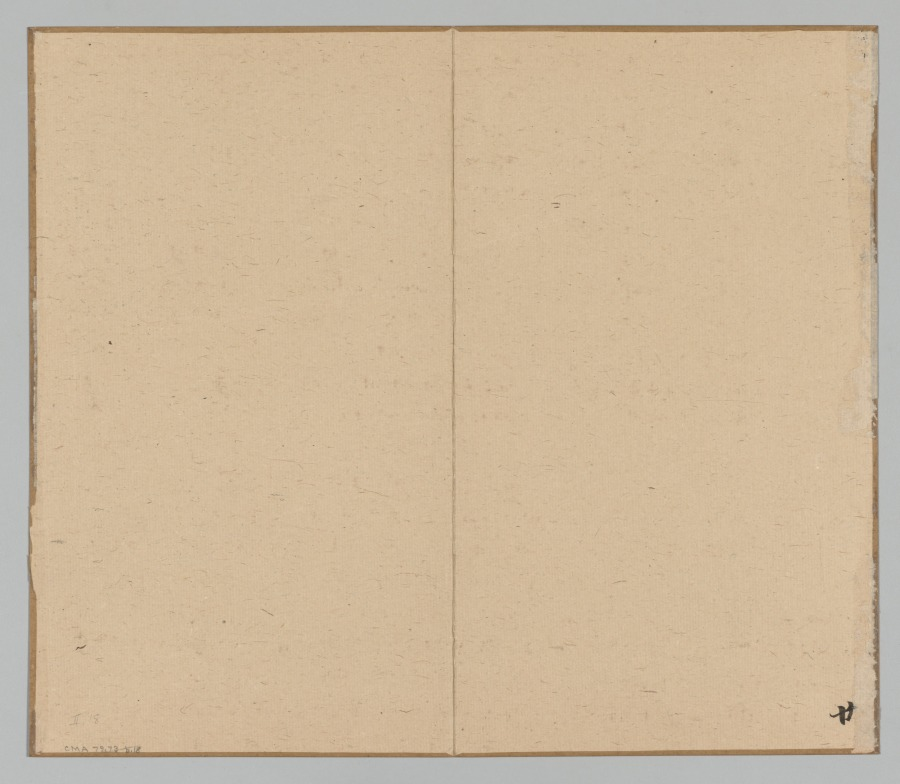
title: Reverberations of Taiga, Volume 2 (leaf 18)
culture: Japan, Edo period (1615–1868)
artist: Aoki Shukuya (Japanese, d. 1802)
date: mid- to late 1700s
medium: double-leaf from a pair of albums; ink and light color on paper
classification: Portfolio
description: Traditionally, young painters in Japan began their studies with an established master-painter. The master's compositions invariably became models that the apprentice copied to learn various ink and brush techniques. Shukuya was a pupil of the famous Kyoto artist Ikeno Taiga, whose style is reflected in these sketches of rocks, trees, and mountains.